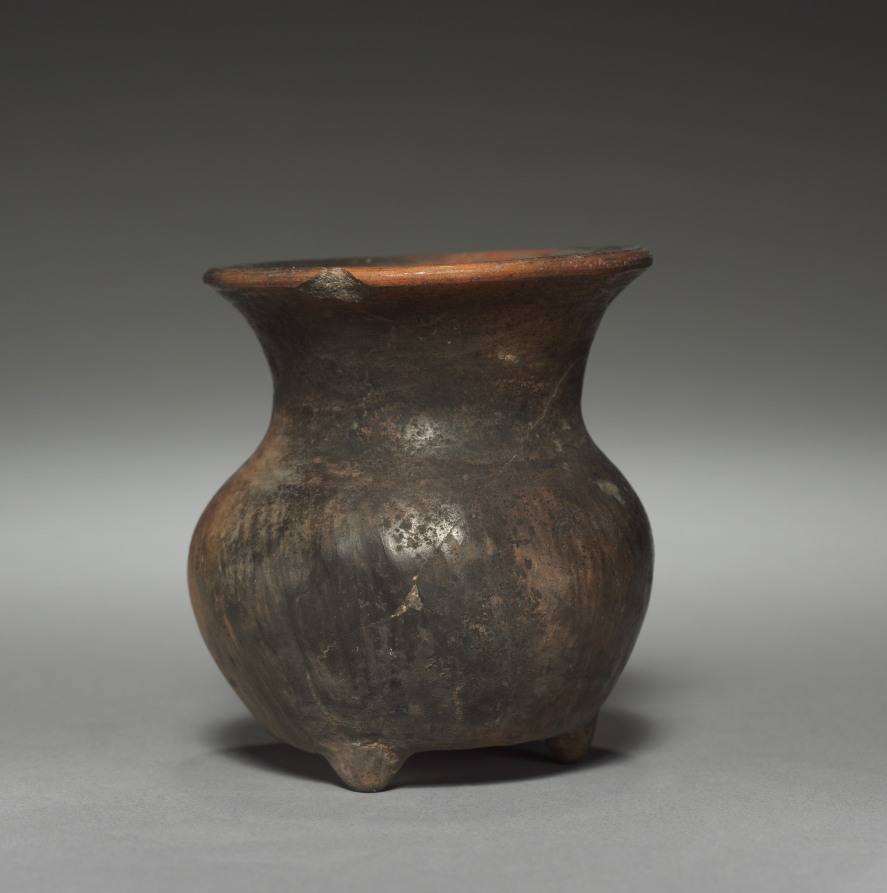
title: Vase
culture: Mexico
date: before 1521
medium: pottery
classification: Ceramic